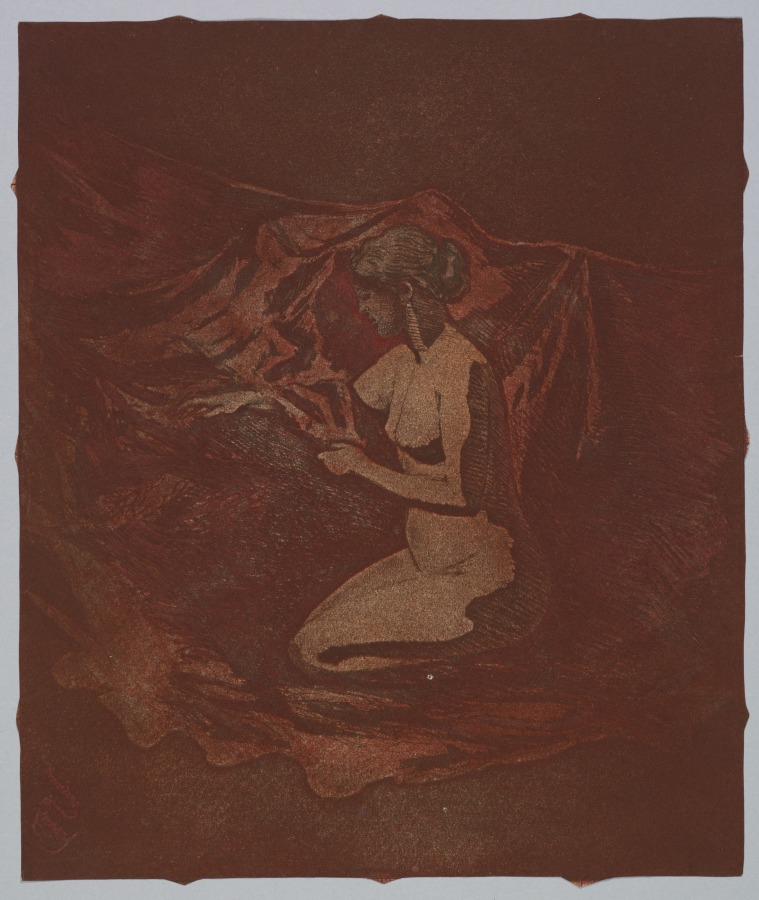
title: Embers Glow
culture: France, 19th century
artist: Theodore Roussel (French, 1847–1926)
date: 1890–1897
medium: color etching and aquatint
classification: Print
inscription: verso, in purple pencil: 2